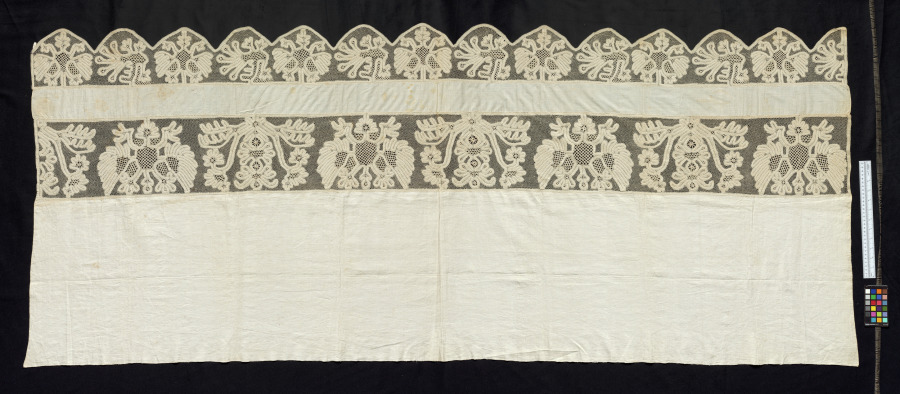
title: Cloth with Lace End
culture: Russia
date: 1800s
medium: cotton or linen (est.); straight (continuous) bobbin lace (Vologda tape lace); the tape forms figural or plant motifs outlined with gimp (heavy cord); plaited ground links the tape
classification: Lace